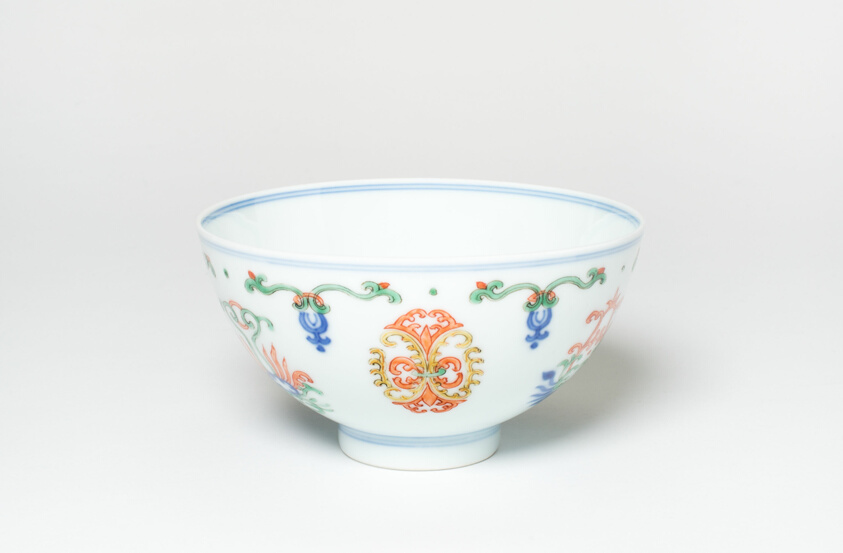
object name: Vessel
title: Bowl with Stylized Medallions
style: Chinese (culture or style)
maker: China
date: Qing dynasty (1644–1911), Yongzheng reign mark (1723–1735)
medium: Porcelain painted in underglaze blue and overglaze enamels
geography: China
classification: bowl; porcelain; dish (vessel); asian art; ceramics; vessel